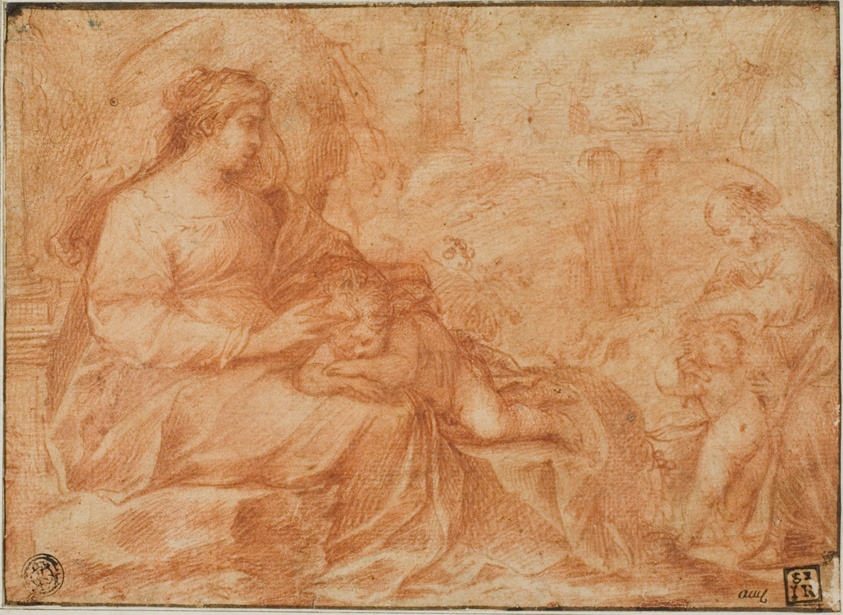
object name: Drawing and Watercolor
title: Rest on the Flight Into Egypt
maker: Attributed to Giulio Cesare Procaccini; Italian, 1574-1625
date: c. 1600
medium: Red chalk on buff laid paper, laid down on ivory laid paper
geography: Italy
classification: drawings (visual works); prints and drawing